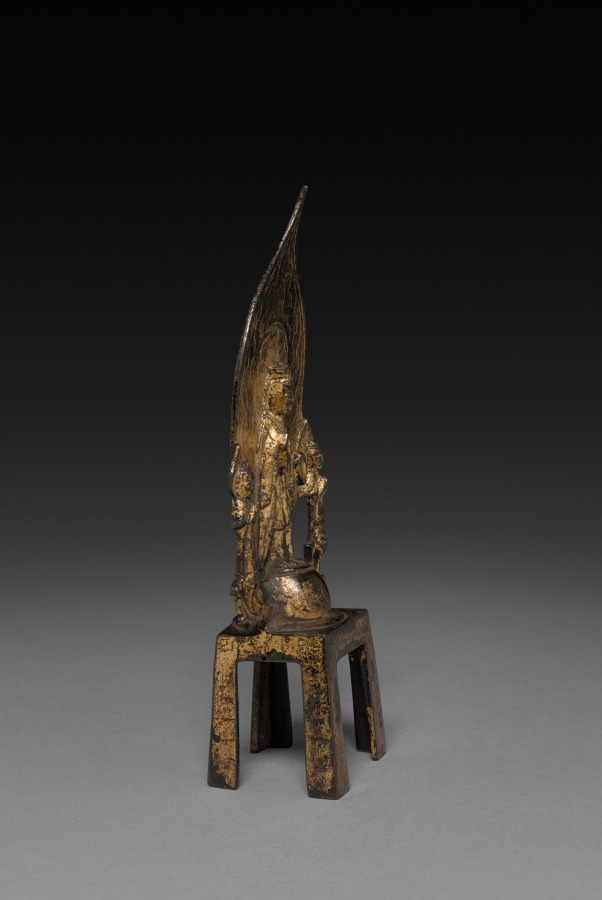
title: Sakyamuni with Two Attendants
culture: China, Sui dynasty (581-618)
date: 600s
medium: gilt bronze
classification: Metalwork